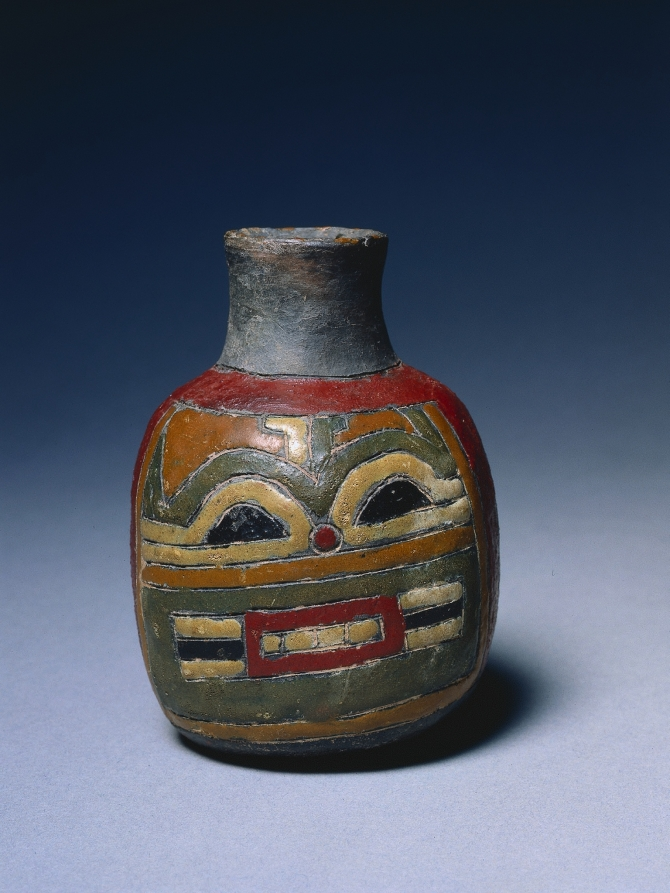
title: Small Bottle with Feline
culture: Peru, South Coast, Paracas (Cavernas) style (700 BCE–1 CE)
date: 700–1 BCE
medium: earthenware, resin-based paint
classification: Ceramic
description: Little is known of the meaning of the beautifully abstracted felines so often incised on Paracas ceramics. The designs achieve much of their complexity through color applied as resin-based paint after the vessel was fired in a smoky atmosphere that blackened its surface.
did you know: Small, wild, reclusive felines, pampas cats live on the margins of agricultural fields, where they prey on rodents and other pests that are a farmer’s bane.